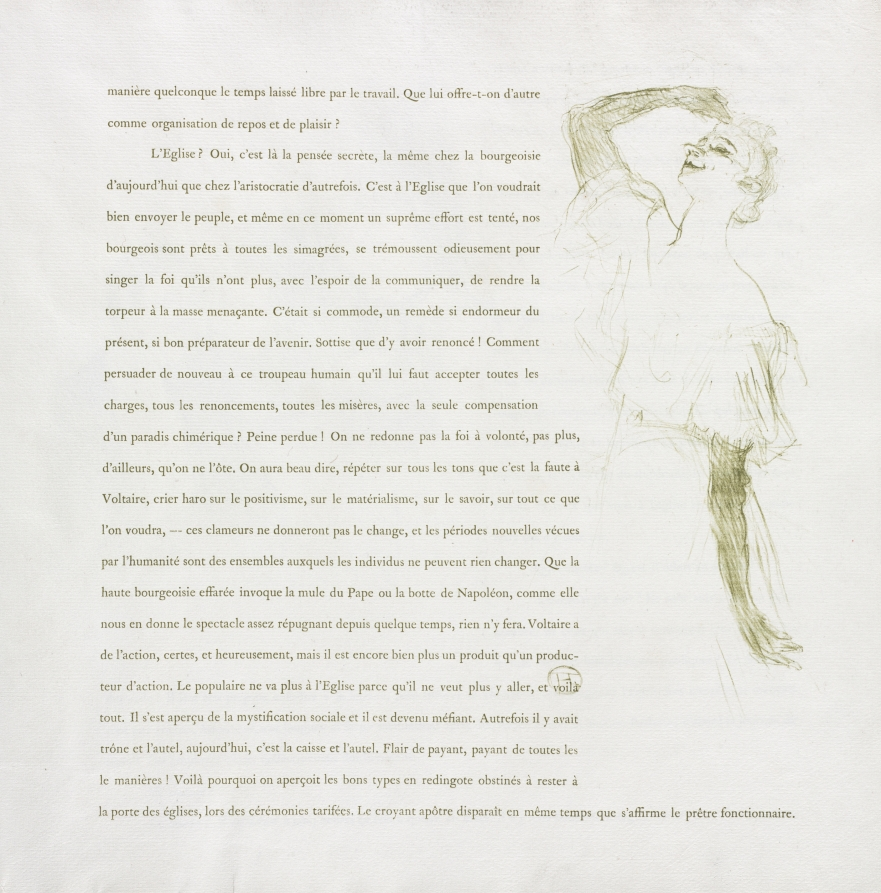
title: Yvette Guilbert-French Series: No. 7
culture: France, 19th century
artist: Henri de Toulouse-Lautrec (French, 1864–1901)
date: 1894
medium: lithograph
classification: Bound Volume